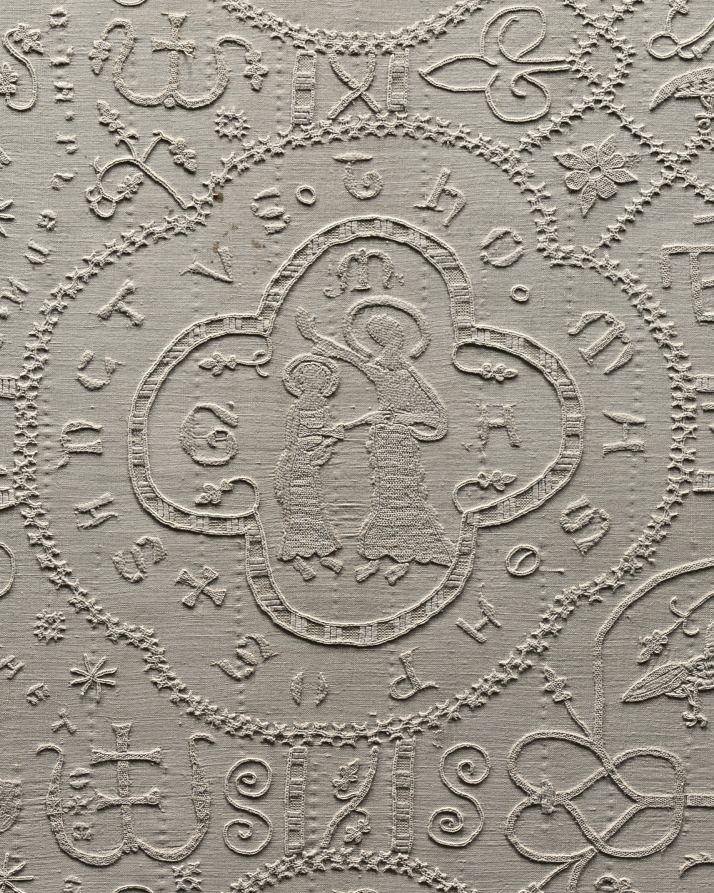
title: Altar Cloth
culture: Germany, Altenberg on the Lahn, Premonstratensian Convent, 14th century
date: c. 1350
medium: embroidery: linen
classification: Embroidery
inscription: various motifs enclosed in quatrefoils with identifying inscriptions in Gothic letters.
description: This large, embroidered altar cloth is one of the rarest, most important medieval church furnishings in existence. It was stitched by nuns in the Premonstratensian Convent in Altenberg on the Lahn River, north of Frankfurt, Germany, and was used to cover the church’s high altar in the weeks leading up to Easter. The cloth is an example of linen embroidery, a specialty of German nuns in the later Middle Ages. The Altenberg monastery church once had valuable furnishings; the high altar retable (a decorated frame with sculptures and paintings on the top of an altar) has survived, the main parts of which are now in the Städel Museum in Frankfurt, Germany.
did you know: When lit from behind, the previously hidden details emerge and the complex design becomes evident.